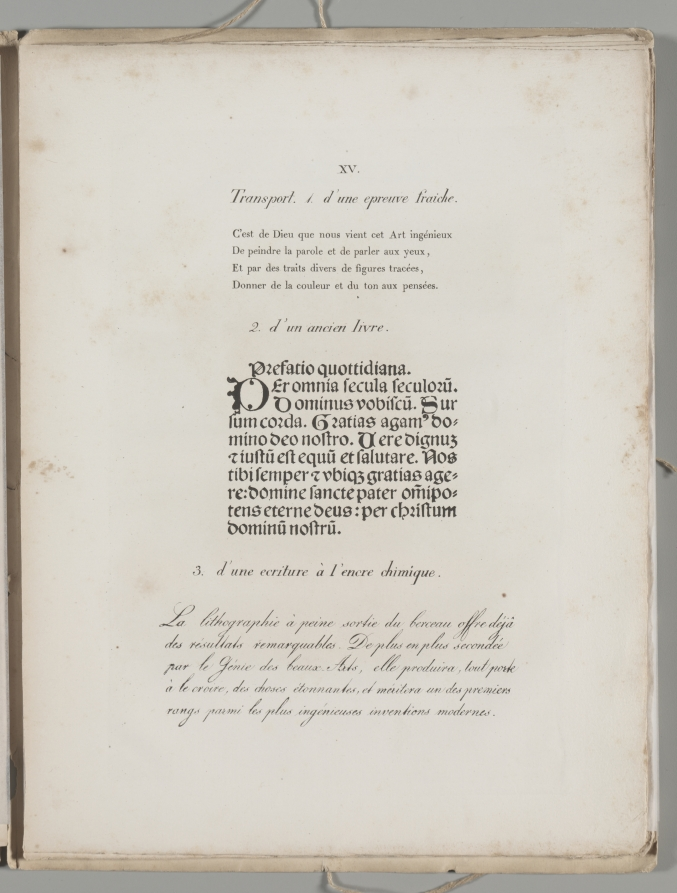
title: Art of the Lithograph: Printing Letters, Plate XV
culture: Germany, 19th century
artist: Alois Senefelder (German, 1771–1834)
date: 1819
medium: lithograph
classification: Portfolio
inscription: On plate: XV. Transport 1. d'une epreuve fraiche. 2. d'un ancien livre 3. d'une ecriture a l'encre chimique